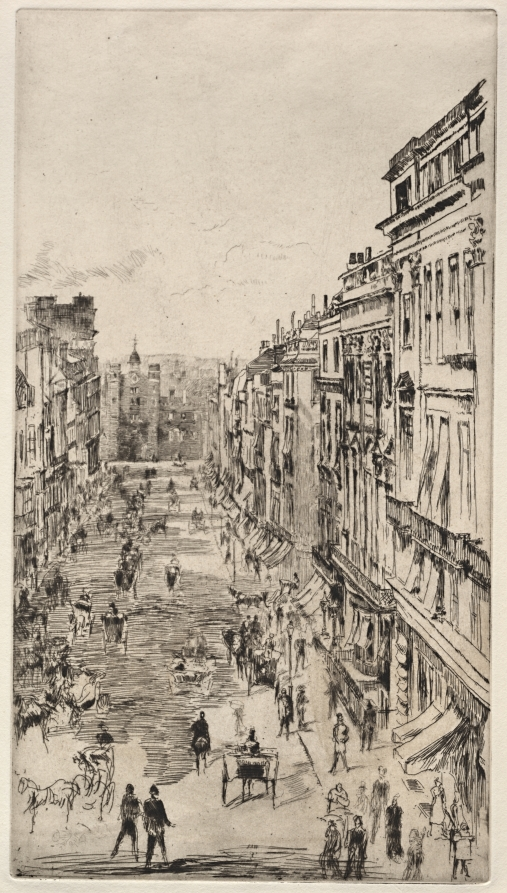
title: St. James Street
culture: America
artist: James McNeill Whistler (American, 1834–1903)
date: 1878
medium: etching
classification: Print